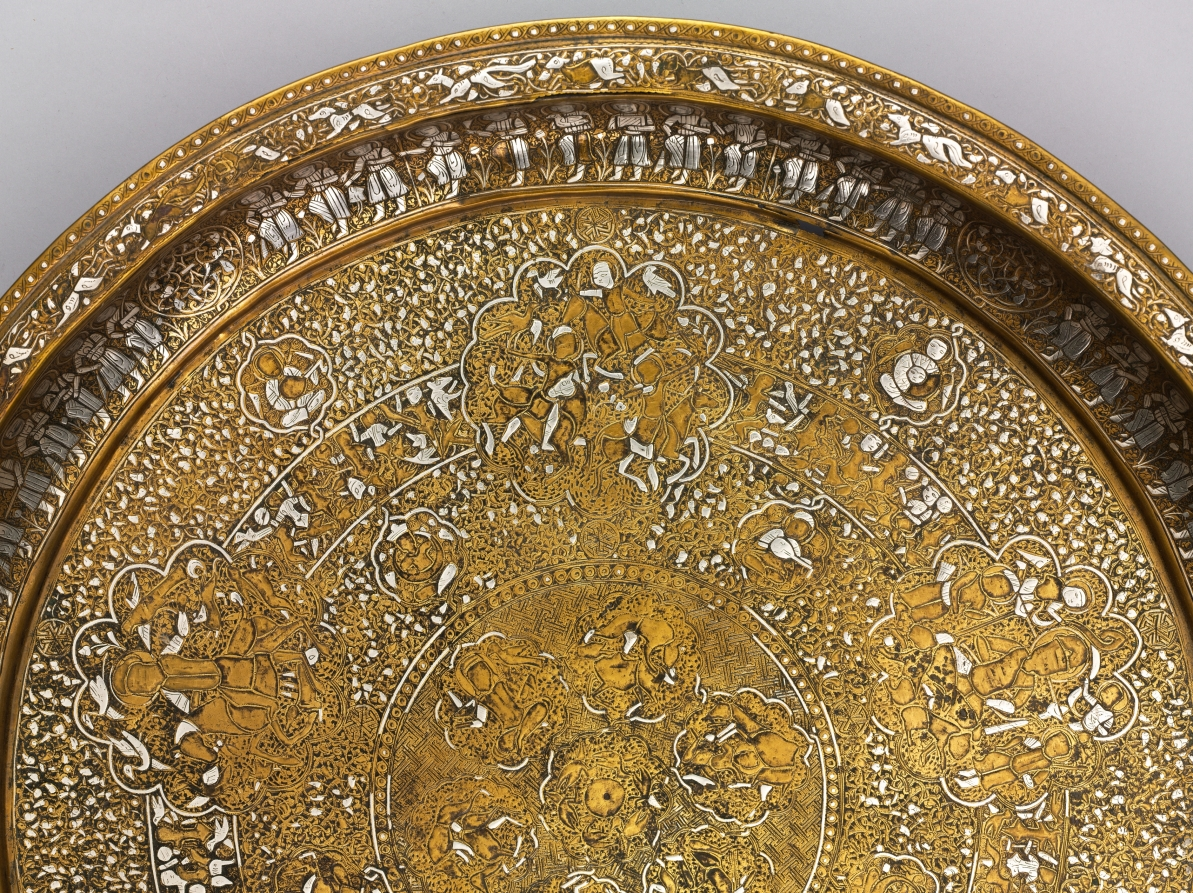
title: Tray Portraying Courtly Pleasures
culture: Syria, Ayyubid period (1171–1260)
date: 1240s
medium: sheet brass inlaid with silver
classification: Metalwork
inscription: The presence of ligatures in the narrow circular bands with interconnected human and animal figures suggests this may be a degenerate form of animated script. It is indecipherable.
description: This tray features images of courtly life interspersed with astronomical symbols. The scenes contained within large multilobed medallions display an enthroned prince with lions at his feet, a banquet, a hunt, dancers, and musicians. Contained within the concentric circles there are also references to solar and lunar motifs, including figures holding sunbursts and lunar crescents. This tray is made of a single sheet of brass and the silver inlay, which is best preserved on the tray’s inner curve, suggests its original brilliance.